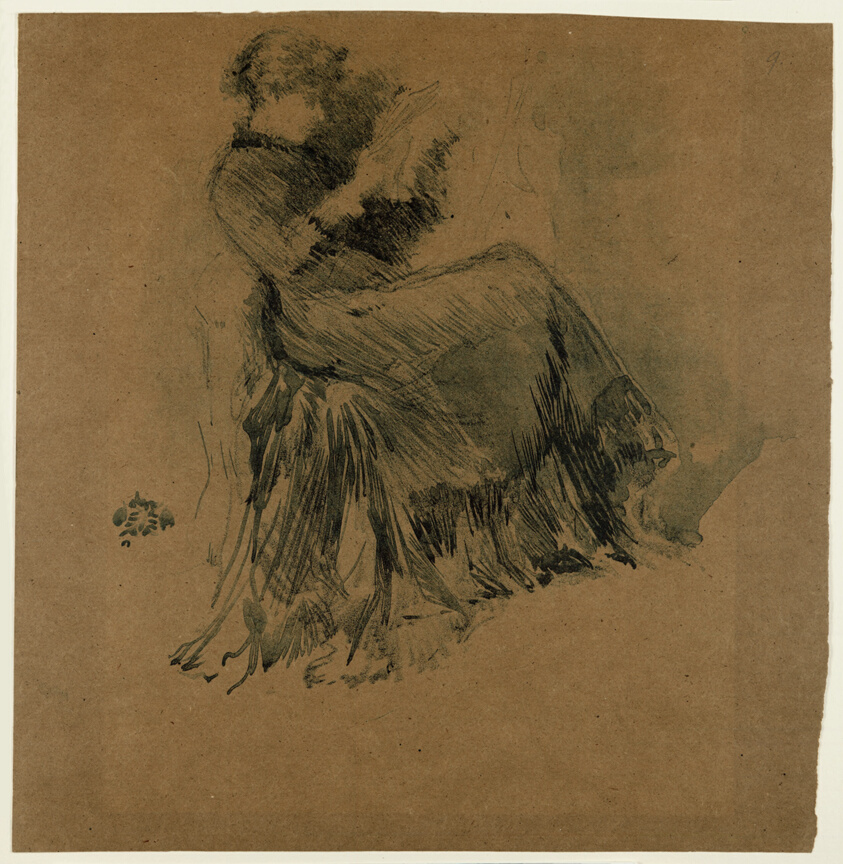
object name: Print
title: Study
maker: James McNeill Whistler (American, 1834-1903)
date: 1878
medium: Lithotint in blue, with scraping, on brown wove paper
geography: United States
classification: lithotint; lithograph; print; prints and drawing; paper